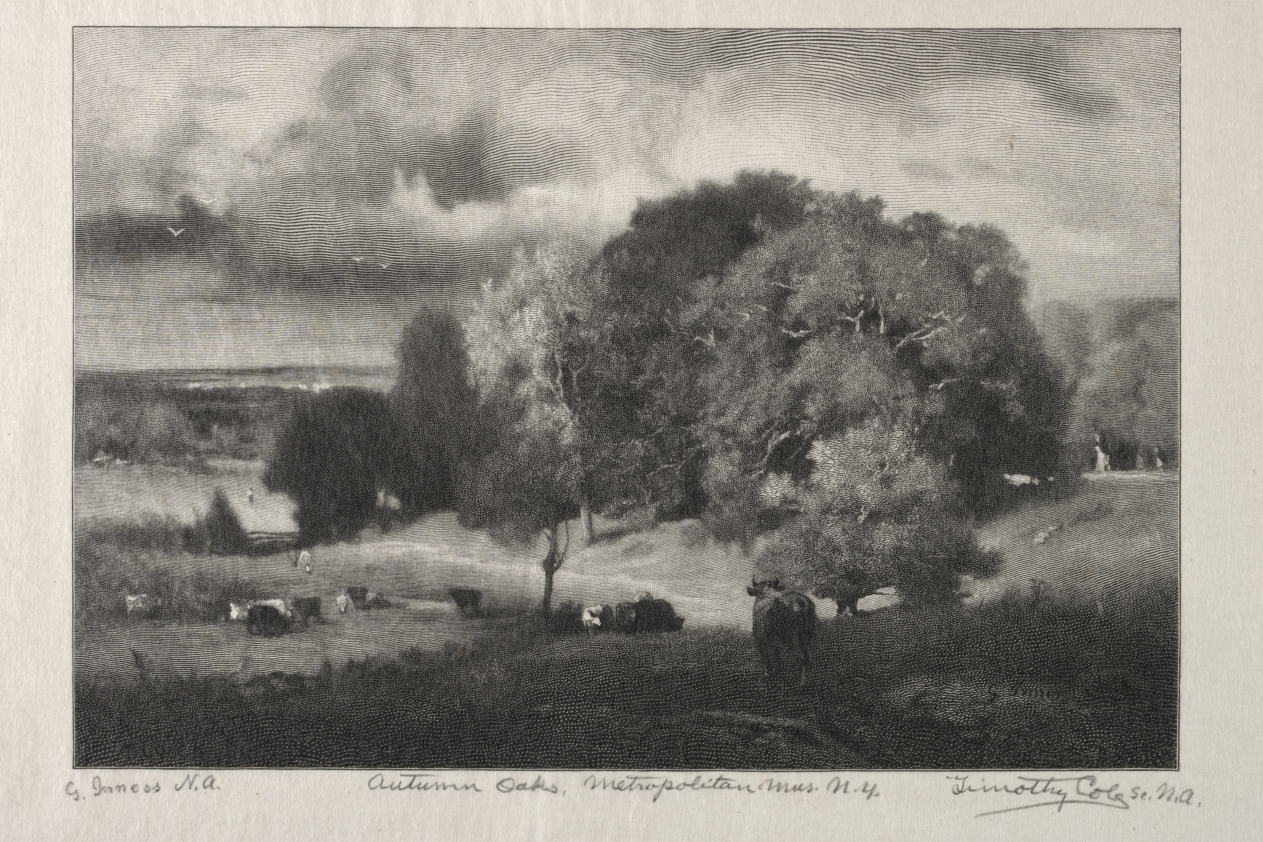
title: Autumn Oaks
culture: America, late 19th-early 20th Century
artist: Timothy Cole (American, 1852–1931)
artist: after George Inness (American, 1825–1894)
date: 1917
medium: wood engraving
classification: Print